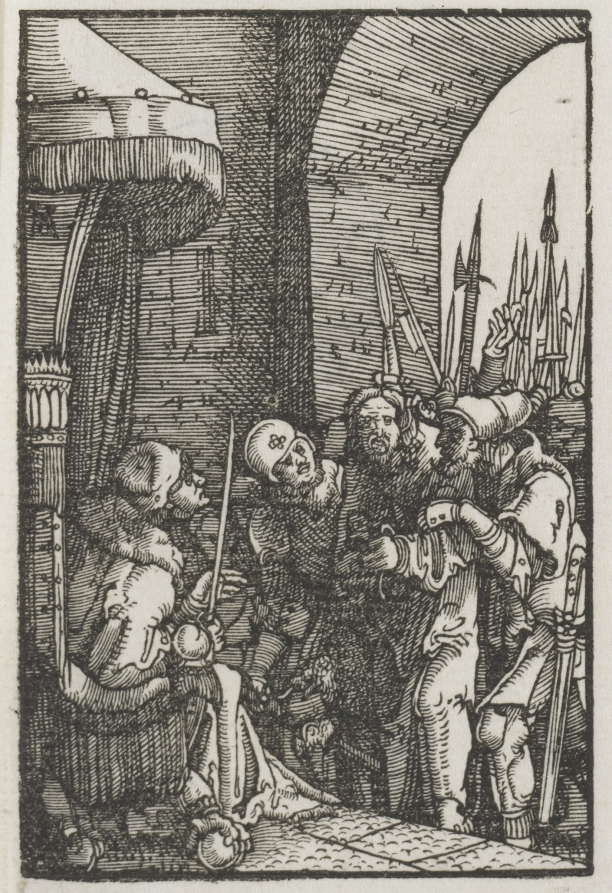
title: The Fall and Redemption of Man: Christ before Pilate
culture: Germany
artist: Albrecht Altdorfer (German, c. 1480–1538)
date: c. 1515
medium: woodcut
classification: Print